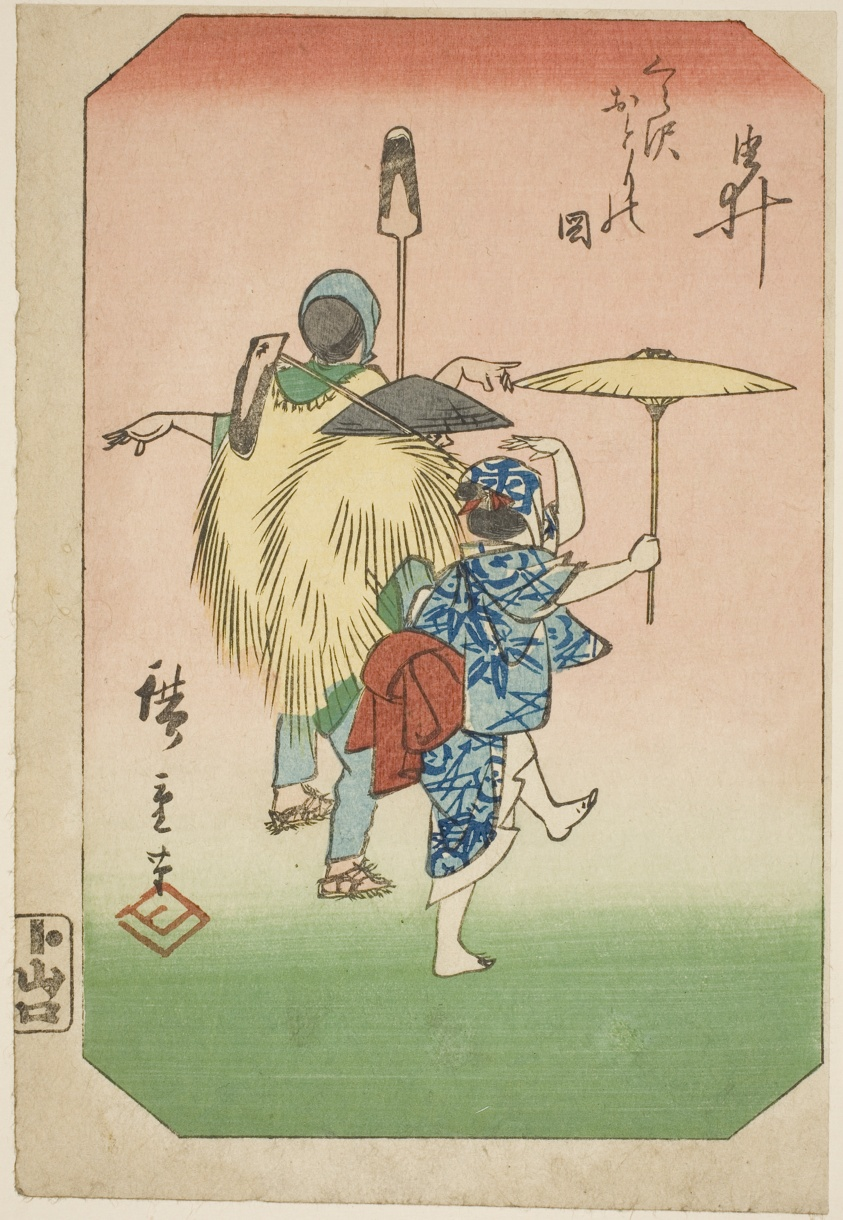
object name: Print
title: Yui, section of a sheet from the series "Pictures of the Fifty-three Stations of the Tokaido Road (Tokaido gojusan tsugi zue)"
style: Japanese (culture or style)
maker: Utagawa Hiroshige 歌川 広重; Japanese, 1797-1858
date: 1856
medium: Color woodblock print; section of harimaze sheet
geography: Japan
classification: woodblock print; print; asian art